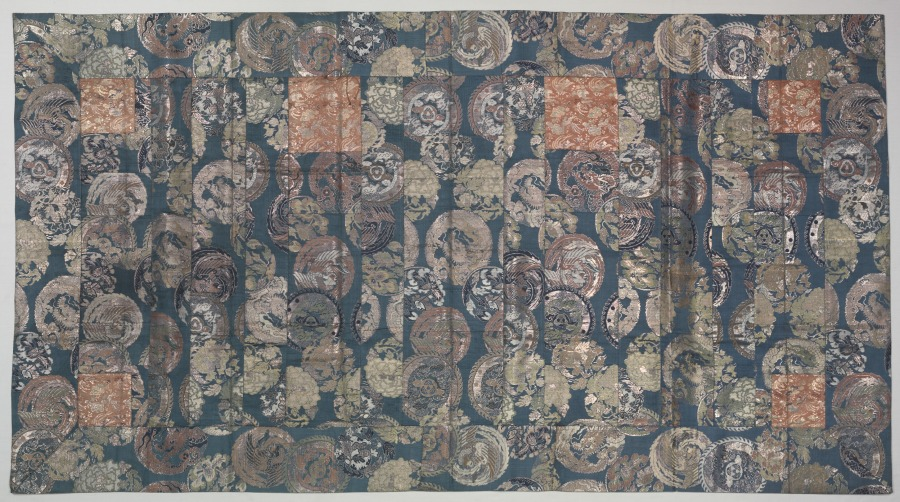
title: Buddhist Surplice (Kesa)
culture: Japan, Meiji period (1868–1912)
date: early 1900s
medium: silk with supplementary weft, brocaded; metal thread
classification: Garment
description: The kesa is a Buddhist monk’s vestment worn folded and draped over one shoulder, and fastened over the chest. In keeping with the austere conditions of monastic life, kesa were traditionally fashioned from remainders of donated garments sewn together into a series of columns. The wider, central column symbolizes the Buddha. The orange squares with a phoenix and flower pattern in each corner represent the deities who guard the four directions, while the two at the top on either side of the central column symbolize attendant bodhisattvas, or the Nio, guardians who protect the Buddhist Law. This kesa is sewn from a textile with bold roundels with dragon and phoenix motifs.